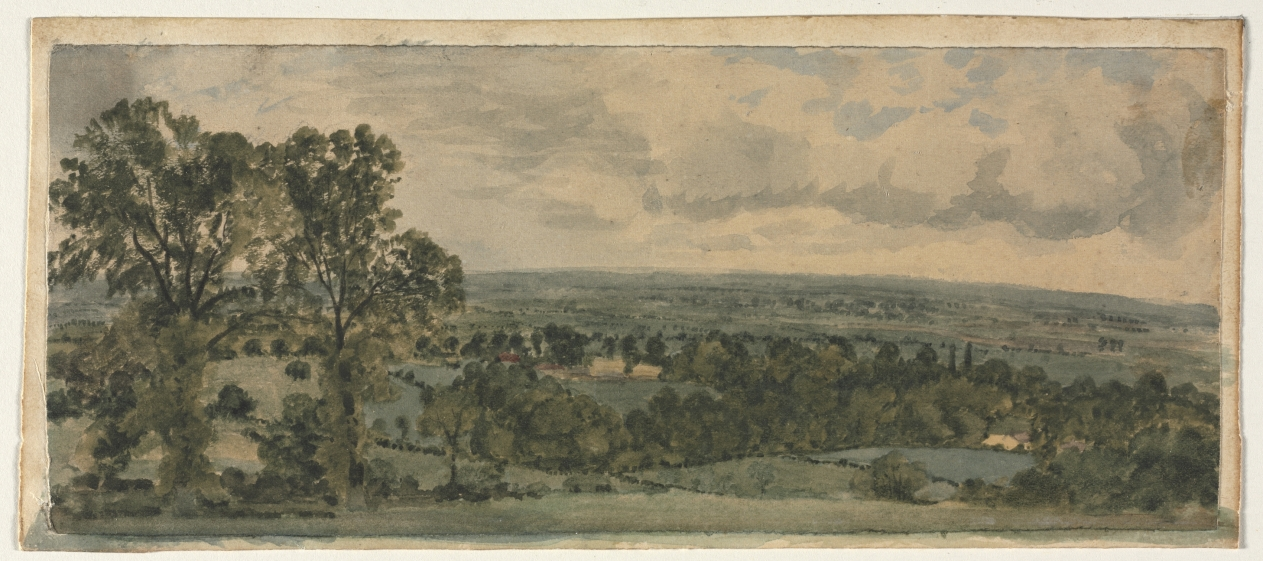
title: Landscape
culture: England, 19th century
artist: John Constable (British, 1776–1837)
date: c. 1796–1837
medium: watercolor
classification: Drawing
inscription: Inscribed on verso: "This drawing was presented to Miss Tham by Constable as a memento of his regards"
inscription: inscribed on verso: "E. Hope to E.F. White Esq."